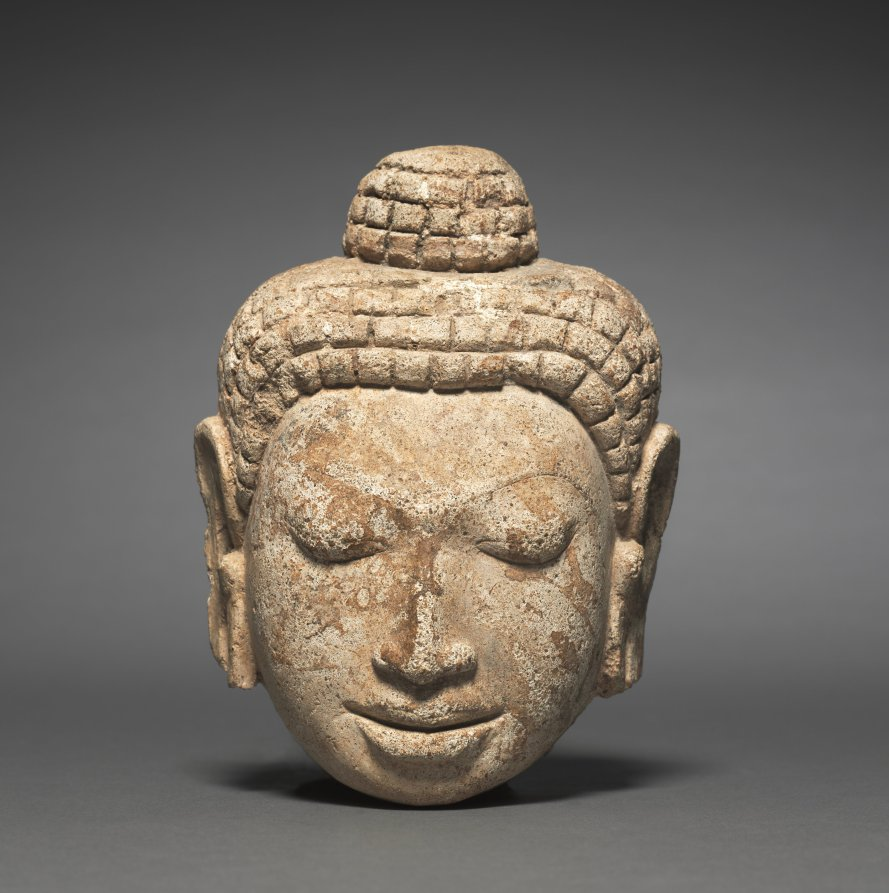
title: Head of Buddha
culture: Thailand, Mon-Dvaravati period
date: c. 600s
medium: stucco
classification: Sculpture